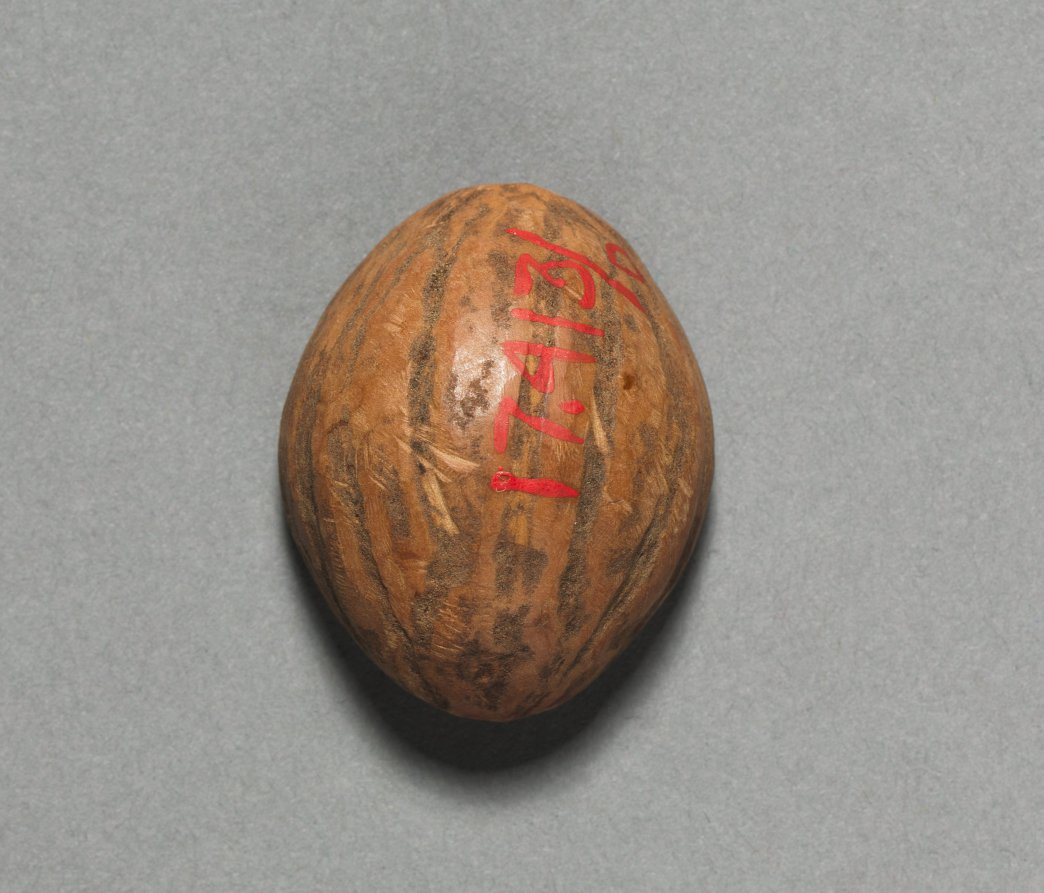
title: Gambling Dice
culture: California, Tulare, Unassigned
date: before 1917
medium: hollow shell, resin, glass beads, mica/seashell fragment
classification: Implements